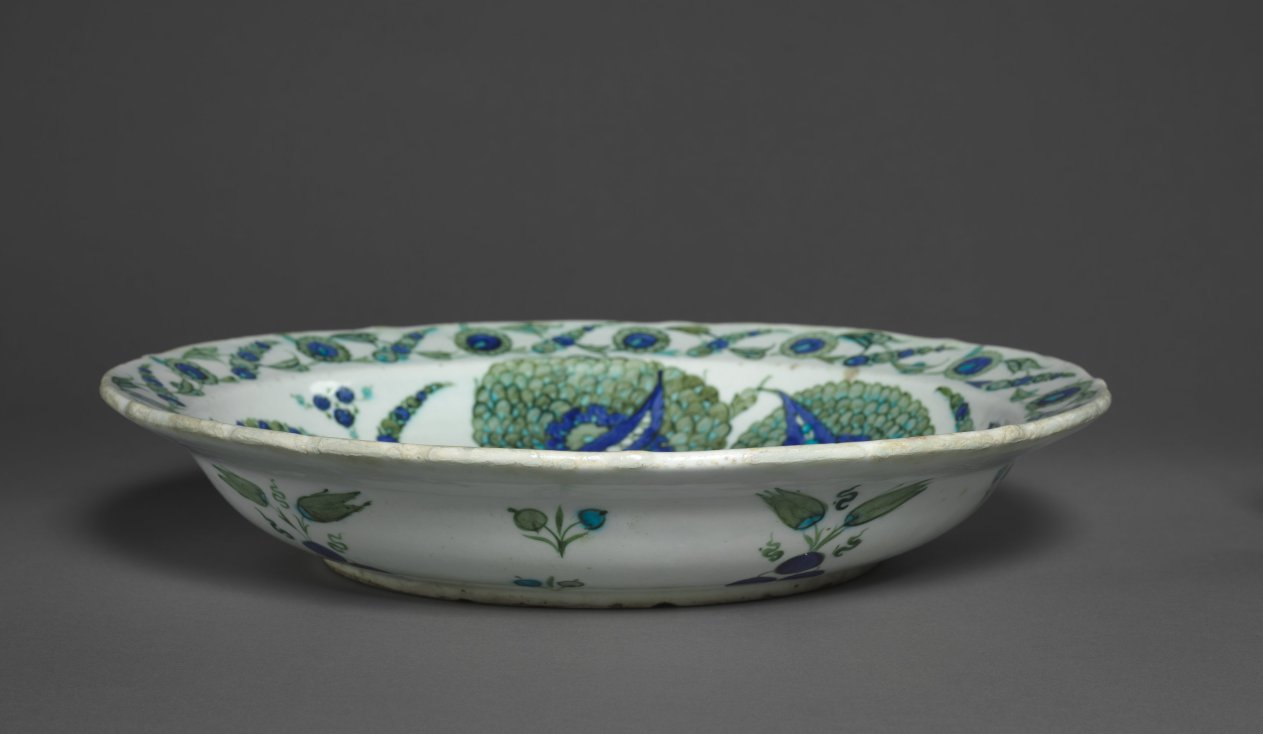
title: Large Dish with Artichokes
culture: Turkey, Iznik, Ottoman period (1299–1922)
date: c. 1535–40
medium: fritware with underglaze-painted design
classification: Ceramic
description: Ceramic vessels and tiles produced in Iznik, Turkey, for the Ottoman court in Istanbul represented the finest Islamic ceramics. Floral and vegetal motifs are a hallmark of Iznik pottery. The center of this dish is covered in a dynamic artichoke motif interwoven with rosettes and serrated saz leaves. The artichoke design was likely inspired by luxury Italian textiles imported into the Ottoman court. The dish represents a high point of Ottoman art during the reign of Sultan Suleyman the Magnificent (1520–66) in which European, Persian, Chinese, and Egyptian influences contributed to a distinct artistic language.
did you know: The artichoke is actually the bud of a thistle—a flower.